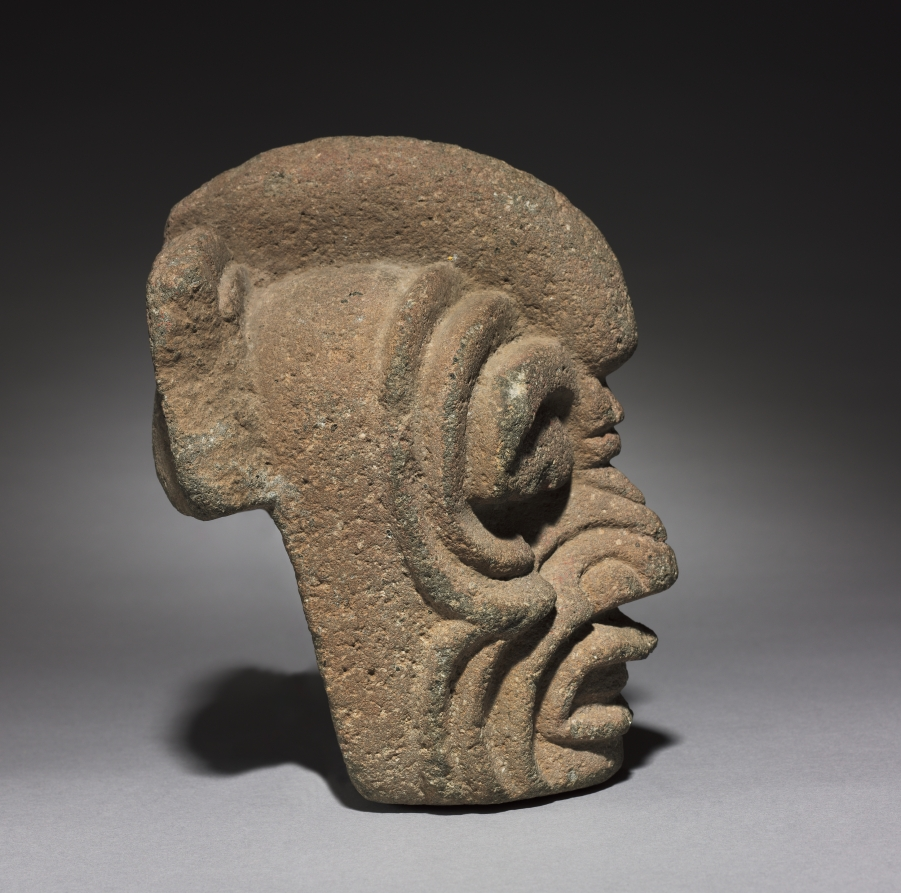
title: Ballgame Stone Head (Hacha)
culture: Mesoamerica, Classic Veracruz style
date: 450–550 CE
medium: gray volcanic stone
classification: Sculpture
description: Little can be said about this head’s identity and meaning, although the deep, dramatic furrows that line the face suggest age and the crest that curves across the top of the head has been compared to that of a bird. Such heads were one element of the regalia used in an ancient ballgame associated with complex mythology and equally elaborate art production on Mexico’s Gulf Coast, in present-day Veracruz.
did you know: This head’s identity is unknown but the deep furrows on the face suggest age.